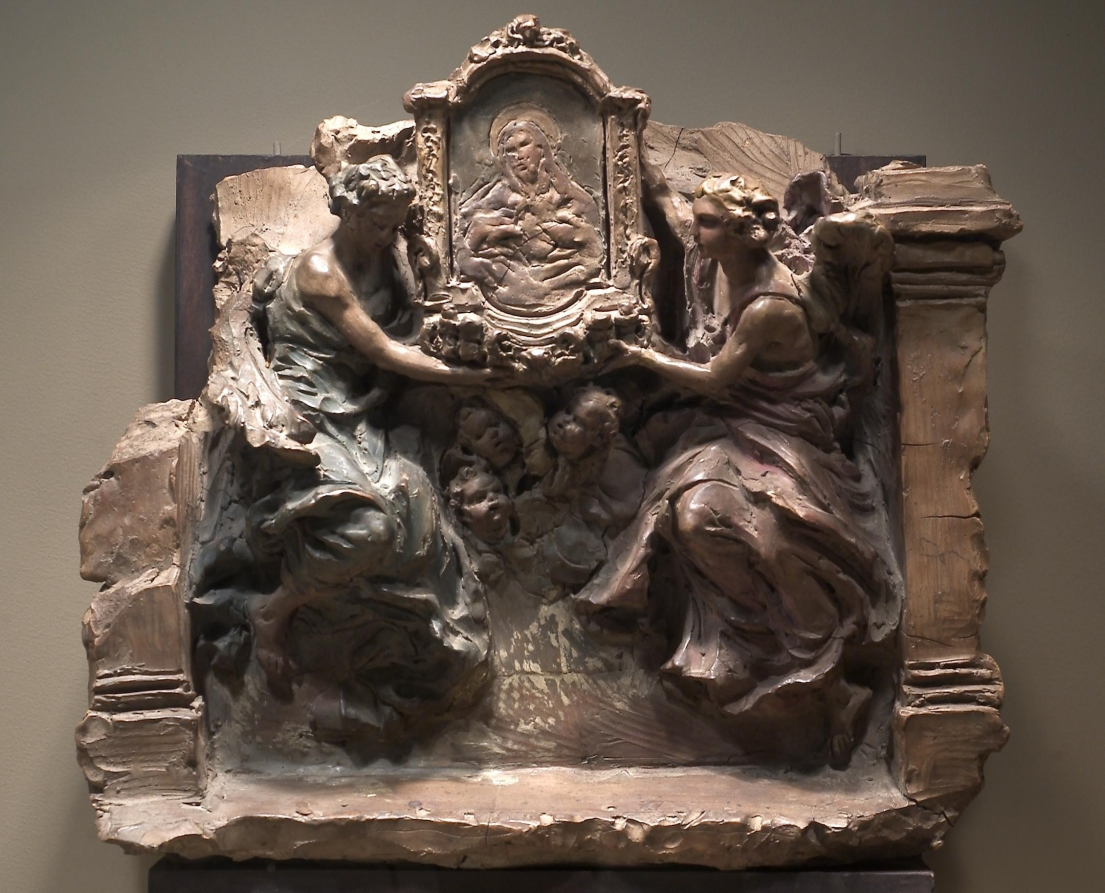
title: Two Angels and Cherubs Bearing an Icon of Christ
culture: Italy, Rome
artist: probably by Paolo Naldini (Italian, 1616–1691)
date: c. 1670–80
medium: terracotta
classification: Sculpture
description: This work is probably a study for a large altarpiece that would have combined several materials, including marble, stucco, and paint. The artist modeled his design in soft clay, which was then hardened by firing; subtle tints suggest the richness of the finished work. The idea of using sculptural figures to support a painted image within an altarpiece was influenced by the work of the Roman sculptor Gian Lorenzo Bernini (1598–1680), with whom Naldini is known to have worked.